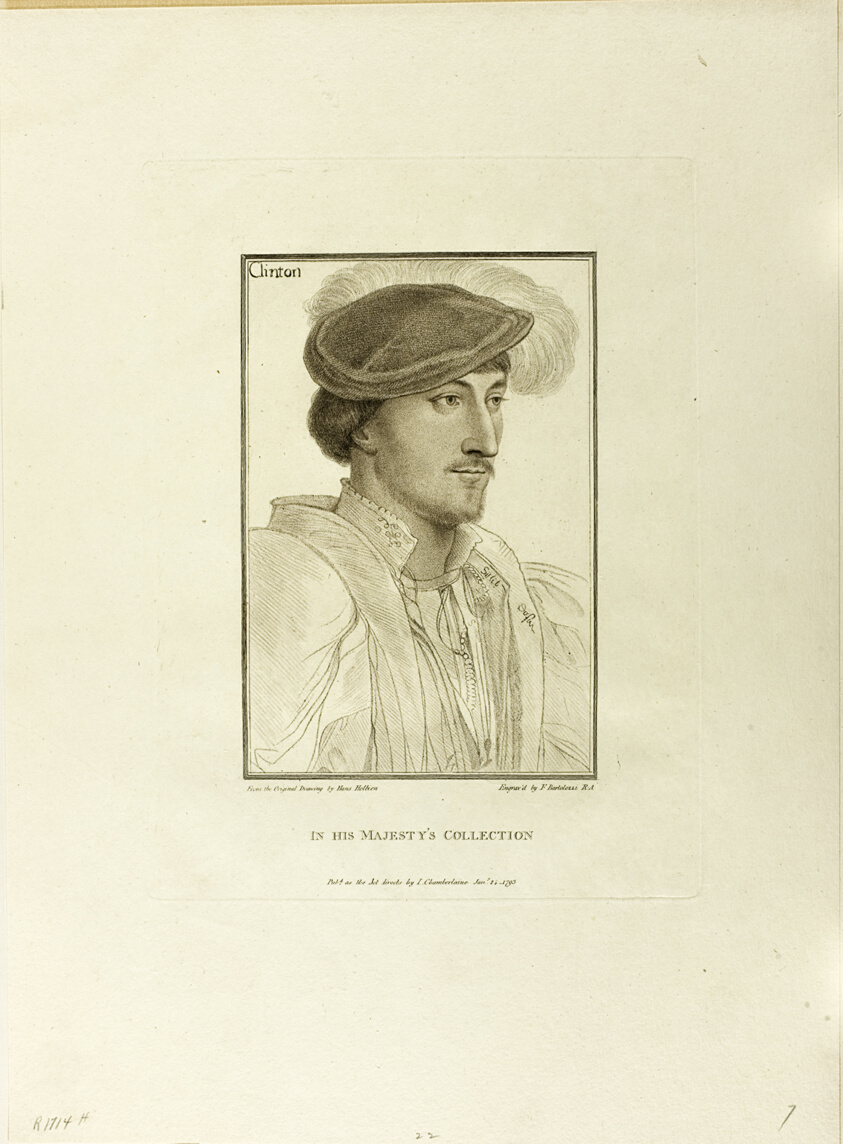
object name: Print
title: Lord Clinton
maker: Francesco Bartolozzi (Italian, 1727-1815); after Hans Holbein the younger (German, 1497-1543)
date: January 24, 1793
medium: Stipple engraving on cream wove paper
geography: Italy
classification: engraving; print; prints and drawing